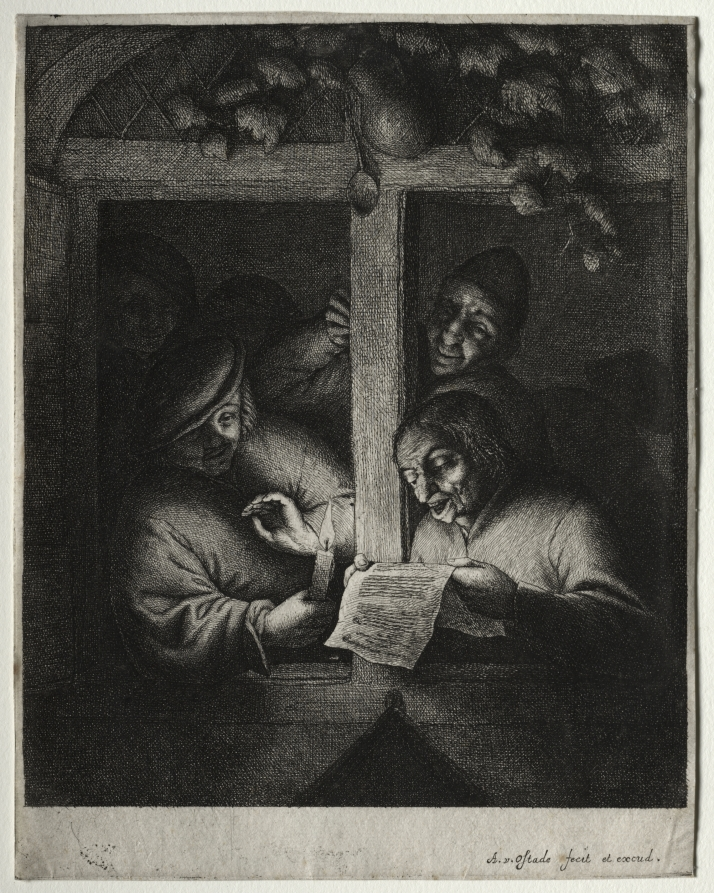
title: The Carol Singers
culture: Netherlands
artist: Adriaen van Ostade (Dutch, 1610–1684)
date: c. 1668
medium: etching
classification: Print